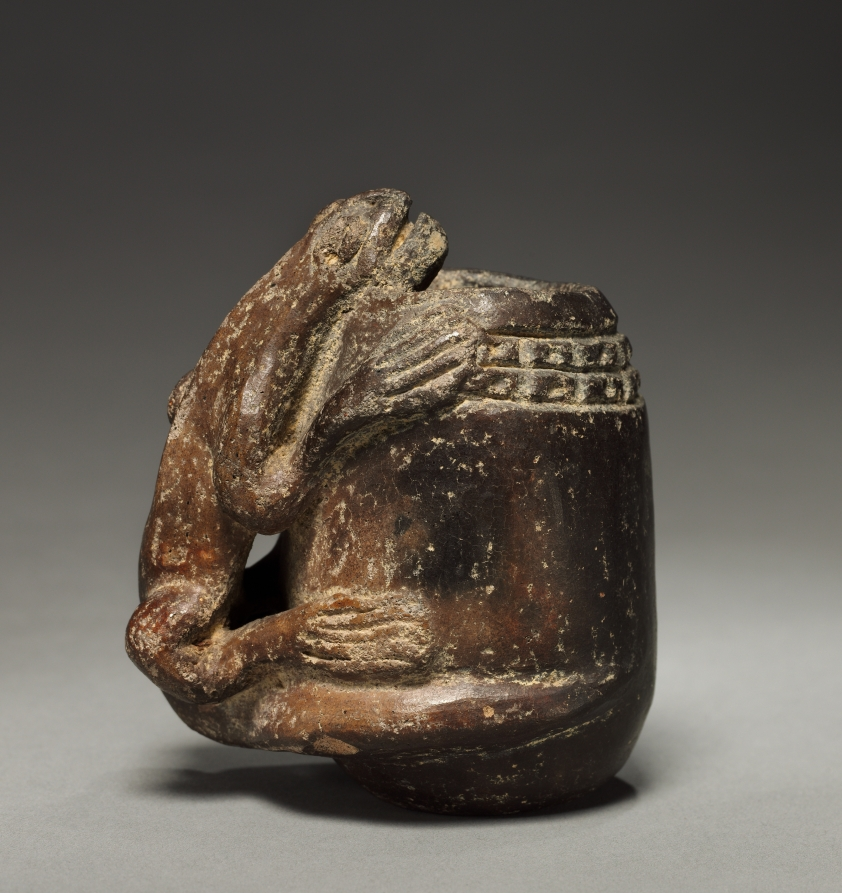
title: Jar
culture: Colombia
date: before 1921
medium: pottery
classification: Ceramic